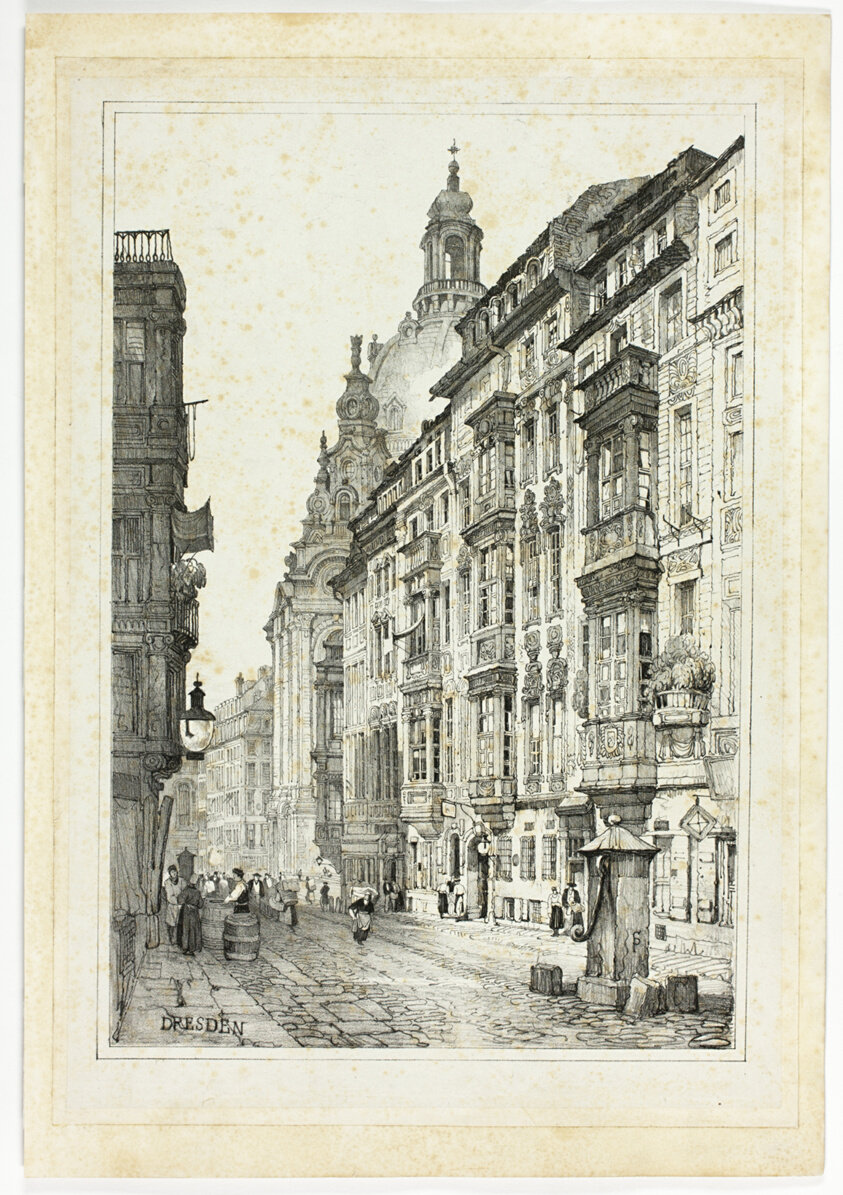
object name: Print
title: Dresden, from Facsimiles of Sketches made in Flanders and Germany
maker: Samuel Prout (English, 1783-1852); printed by Charles Joseph Hullmandel (English, 1789-1850)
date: 1833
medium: Lithograph in black on grayish-ivory chine, laid down on ivory wove paper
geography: England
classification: lithograph; print; prints and drawing